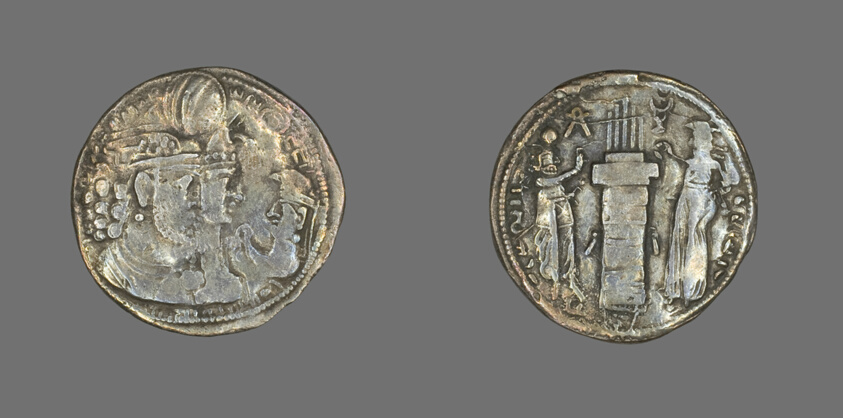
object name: Coin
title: Drachm (Coin) Portraying King Varahran II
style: sassanian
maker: Sasanian; Persian (now Iran)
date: 238-275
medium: Silver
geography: Greece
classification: coin; ancient art